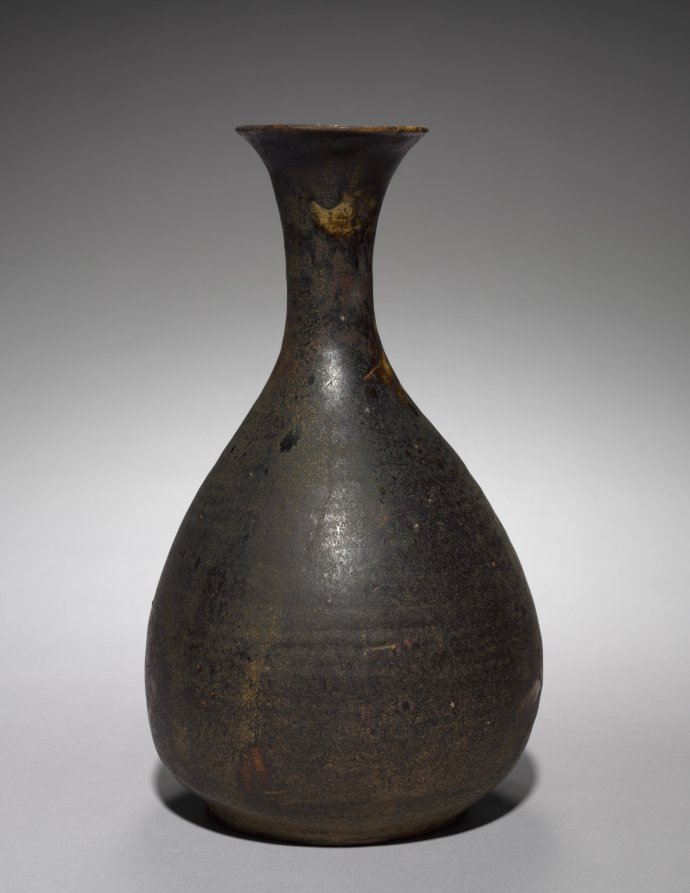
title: Black-glazed Bottle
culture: Korea, Goryeo dynasty (918–1392)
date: 1200s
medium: glazed stoneware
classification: Ceramic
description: This black-glazed bottle is characterized by the use of a glaze with a high iron oxide content. Unlike intricately decorated celadons, black-glazed stoneware was used for everyday for containing various type of liquid.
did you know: This bottle may have served as a wine container.